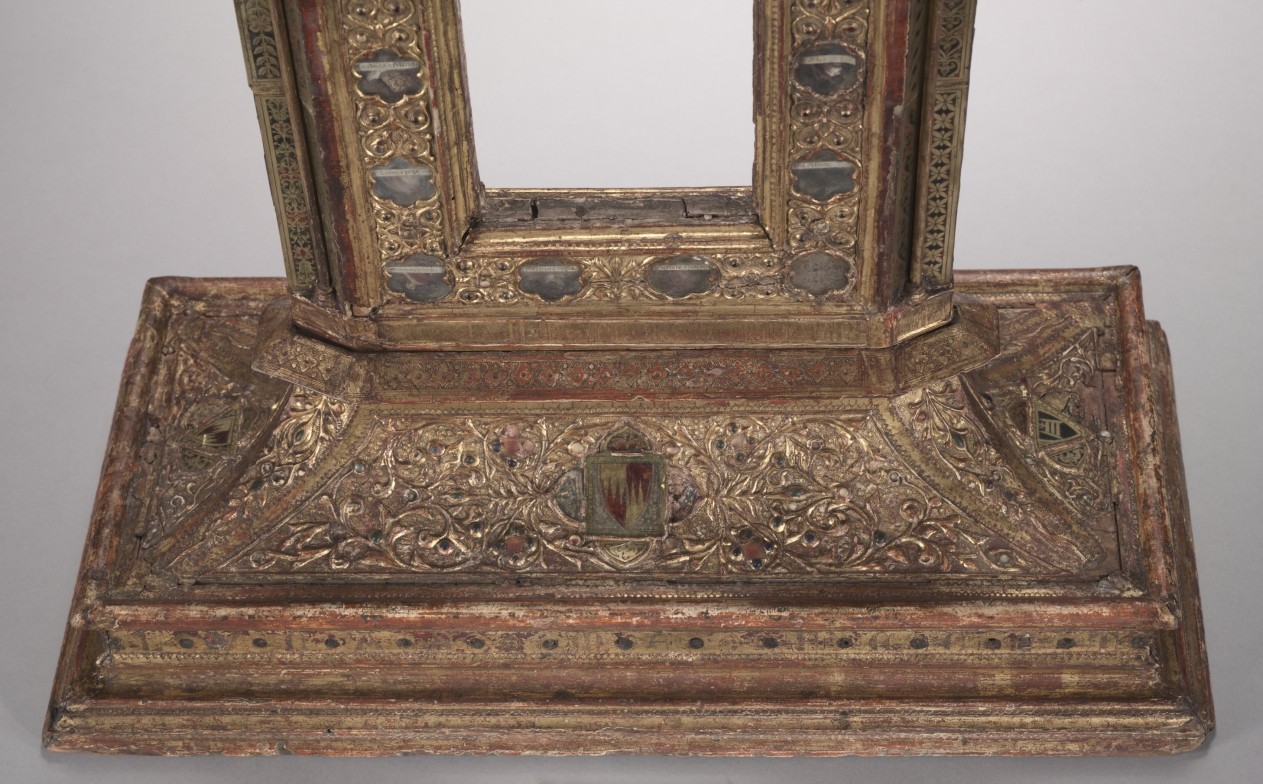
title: Frame for a Portable Reliquary Icon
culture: Italy, Siena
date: 1347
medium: gilded wood, modeled gesso, verre églomisé, glass cabochons, and relics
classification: Glass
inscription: an inscription with a stipled background runs around the lowest edge of the upright part of the frame: obverse: HOC/OPUS : FACTUM . FUIT . SUB . ANNO . DO/MINI; reverse: [small loss] /CCC . XLVII . TEMPORE . DOMINI . MINI/CINI. [This/work : has . been . made . under . year . of . the . Lord [small loss] /300 47 . in . the . time . of the Lord . Mini/Cini.] Another inscription appears on the obverse and reverse of the base: LUCAS ME FECIT. [Luke has made me.]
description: In the Middle Ages relics were thought to possess extraordinary power and were enshrined in lavish vessels called reliquaries. This complex frame once contained a painted image on each side, believed to be the Madonna and the Crucifixion, both long since lost. These images were surrounded by 17 carefully labeled relics, still visible. Intentionally portable, such votive objects could be easily carried from room to room or building to building as needed. A Latin inscription around the base reads: This work has been made under the year of the Lord CCCXLVII [1347] in the time of the Lord Mini/Cini. The inscription likely refers to Mino Cinughi, rector of the Hospital of Santa Maria della Scala in Siena, 1340-51. The Cinughi coat of arms as well as those of the hospital appear on the base. Another inscription, LUCAS ME FECIT (Luke made me), appears on both sides of the base. While this object probably resided on an altar in the hospital, the fact that it has two sides suggests it was carried aloft in processions.